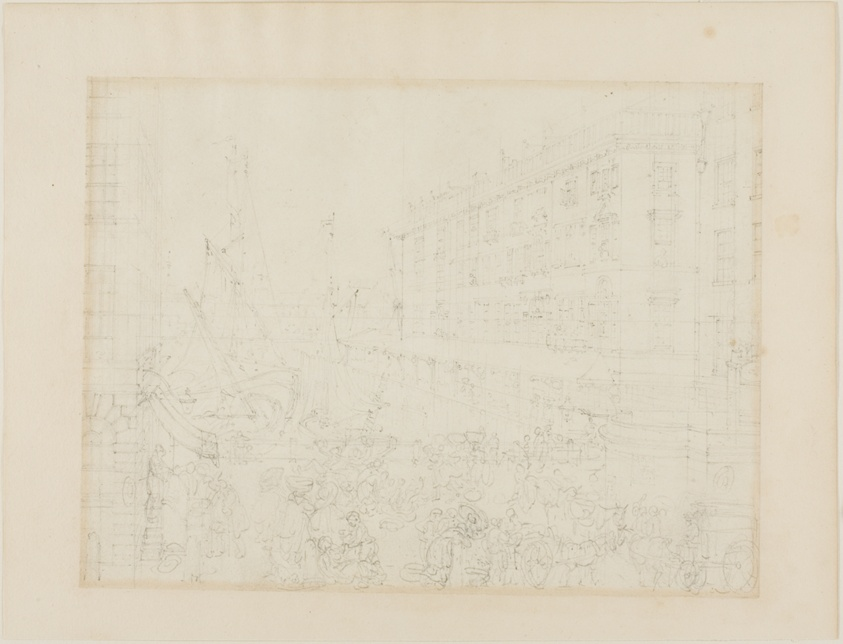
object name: Drawing and Watercolor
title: Study for Billingsgate Market, from Microcosm of London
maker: Augustus Charles Pugin (English, born France, 1762-1832); Thomas Rowlandson (English, 1756-1827)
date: c. 1808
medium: Graphite on ivory wove paper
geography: England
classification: graphite; drawings (visual works); prints and drawing